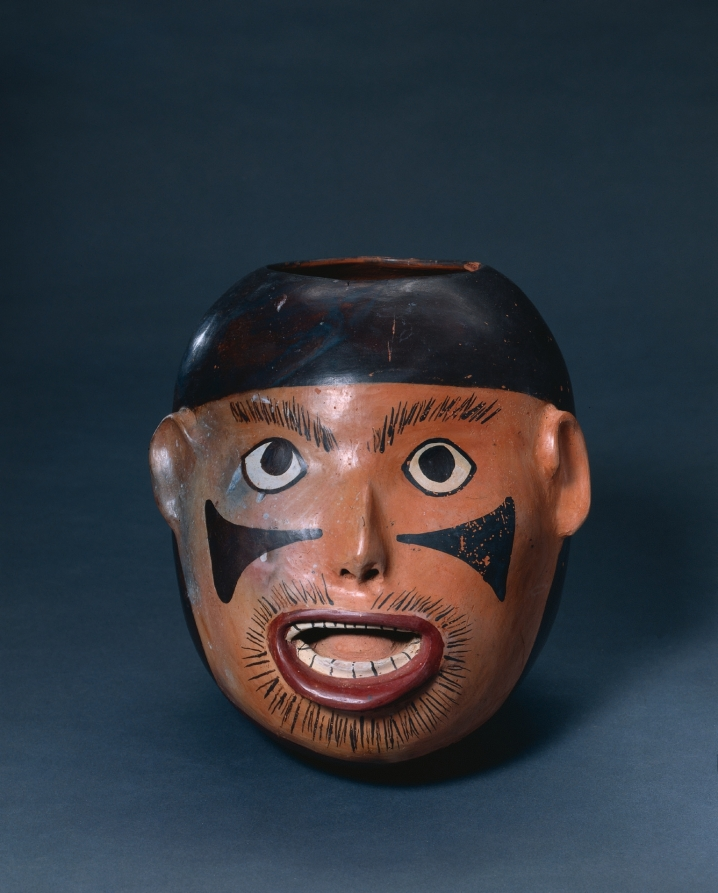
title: Severed Head Effigy Vessel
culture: Peru, South Coast, Nasca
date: c. 100–350 CE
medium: earthenware with colored slips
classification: Ceramic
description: The Nasca people were organized politically into small, competing chiefdoms, and warfare was common. This vessel represents a freshly severed human head (probably that of a captured and sacrificed prisoner) with staring eyes, gaping mouth, and blood-red underside. Modeling of the mouth cavity, tongue, and teeth lends the image a startling realism. Human sacrifice by decapitation was a central element of Nasca religion, essential to agricultural fertility. Severed heads were emptied and dried, then pierced through the forehead and suspended from a thick cord. Such preserved heads have been recovered from offering deposits and from tombs, where they were buried with their captors.